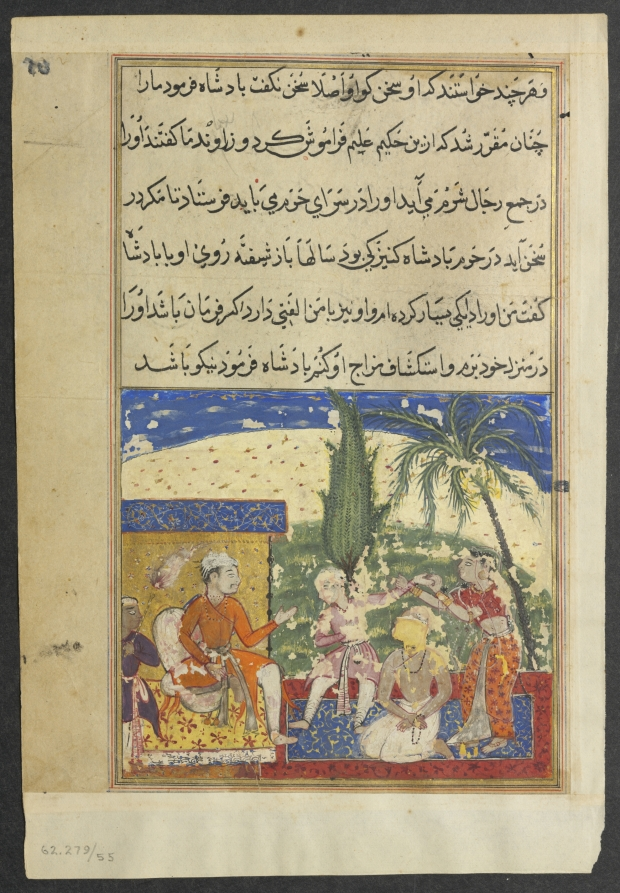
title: The king’s handmaiden takes the prince away to the harem, from a Tuti-nama (Tales of a Parrot): Eighth Night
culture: Mughal India, court of Akbar (reigned 1556–1605)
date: c. 1560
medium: gum tempera, ink, and gold on paper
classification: Painting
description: An infatuated handmaiden, wearing a sari and veil, leads the young prince away from the seated king. The king and his viziers have agreed to send the prince to the harem in hopes that he will speak in a more relaxed environment.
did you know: The pink underdrawing is visible in places where the paint has chipped away.